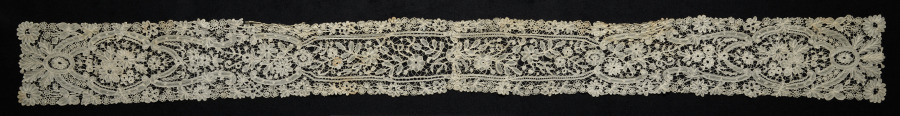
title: Lace Lappet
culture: Belgium, Brussels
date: 1880–99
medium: Linen: bobbin lace (Duchesse)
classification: Lace